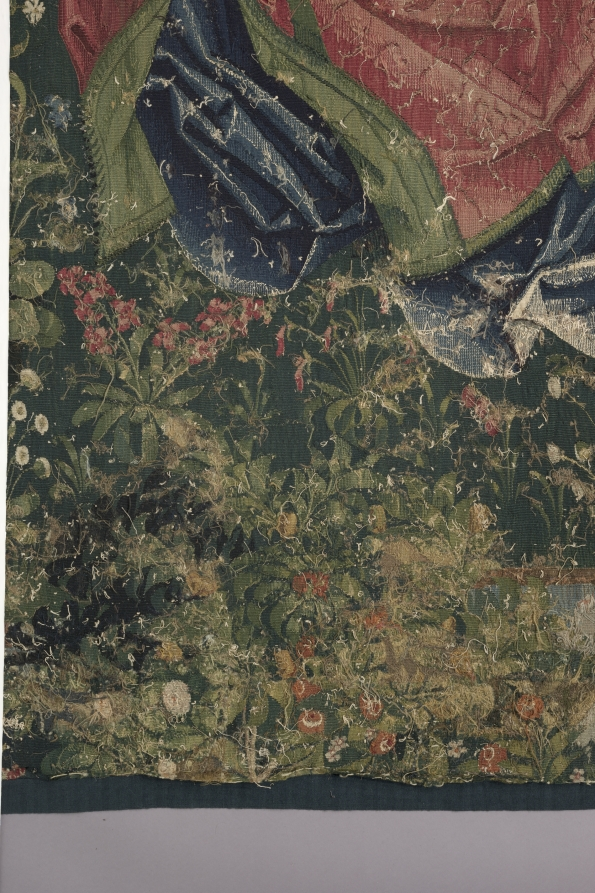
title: The Triumph of Eternity (from Chateau de Chaumont set)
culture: France, Lyon(?), early 16th century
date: 1512–15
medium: silk and wool; tapestry weave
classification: Tapestry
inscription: French verse in Gothic letters translates as follows: "Nothing triumphs by right authority, Unless it be conducted by Eternity. Nothing is permanent beneath the firmament, But above us triumphs Eternity."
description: The Triumph of Eternity is represented by the Coronation of the Virgin. Dressed in crimson velvet with an opulent brocaded velvet shawl, the Virgin is seated in the center as two angels hold a crown over her head. Five musical angels surround her playing an organ, recorder, straight cornetto, harp, and lute, while another sings from an open music book. The scenes in the set display a conservative style in which the figures are placed in shallow landscapes, thereby ignoring pictorial innovations for depicting space and mass. The verse in Old French at the top states: Nothing triumphing by due authority Remains permanent and durable. Nothing is permanent under the heavens, But above, eternity triumphs.